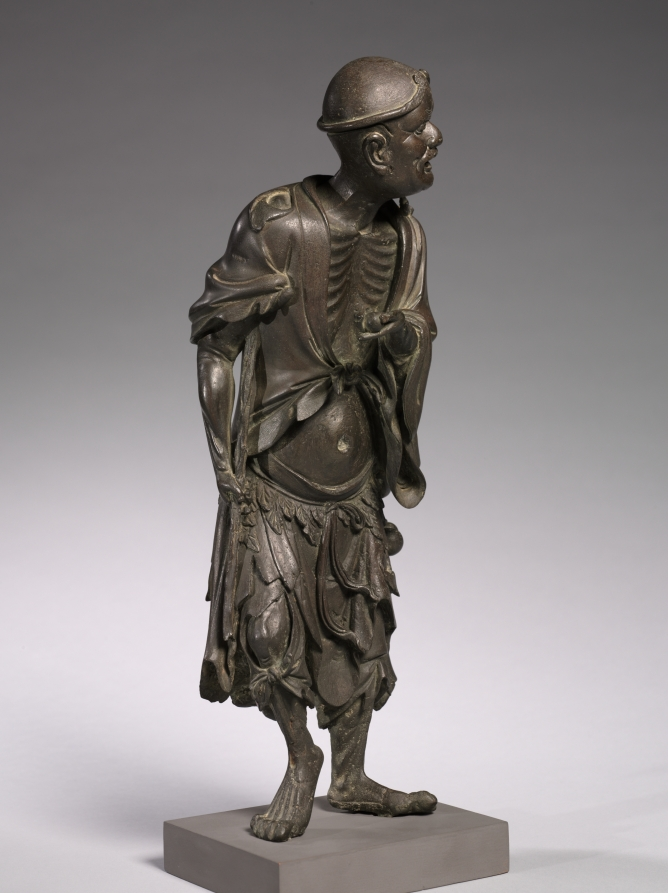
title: The Immortal Li Tieguai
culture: China, Ming dynasty (1368–1644)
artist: Su Wennan (Chinese)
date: 1500s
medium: bronze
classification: Sculpture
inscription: 蘇文南製 (Su Wennan Zhi )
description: This bronze statue of Li Tieguai shows him dressed as a beggar in a tattered robe, holding a crutch in his right and a ball of medicine in his left hand. Li Tieguai is the patron saint for physicians and legend says that he dispenses pills from the gourd for the sick. He wears a belt of leaves and another gourd hangs from his waist. His head is crowned with what appears to be a metal ring, signifying his immortal status. Four incised characters in seal script on the back of the figure reads “made by Su Wennan (蘇文南製).”